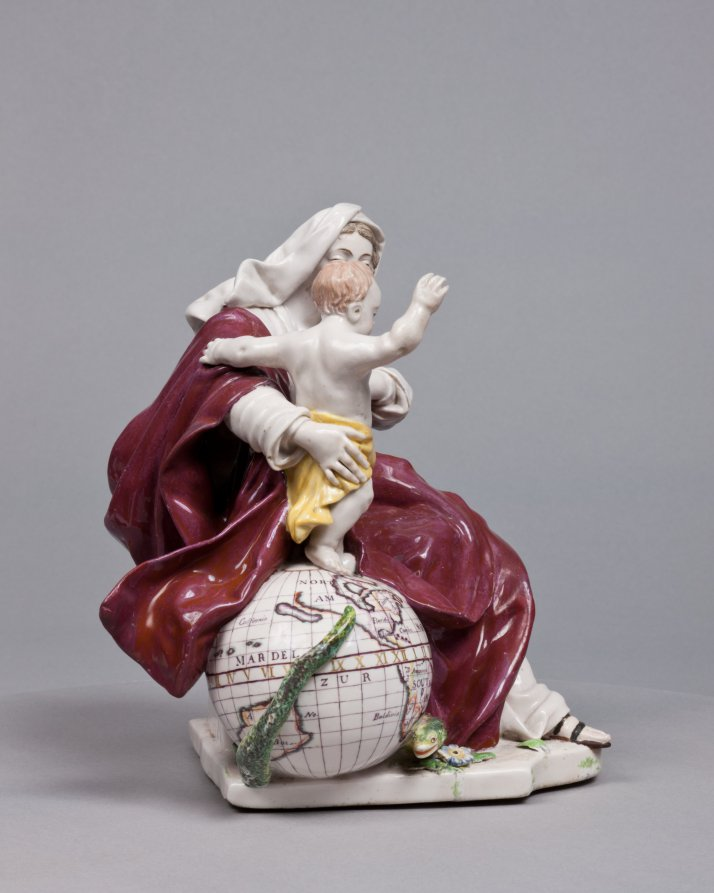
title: Madonna and Child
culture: England, Chelsea, 18th century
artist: Chelsea Porcelain Factory (Britain, London, 1745–84)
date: c. 1755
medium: porcelain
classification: Ceramic